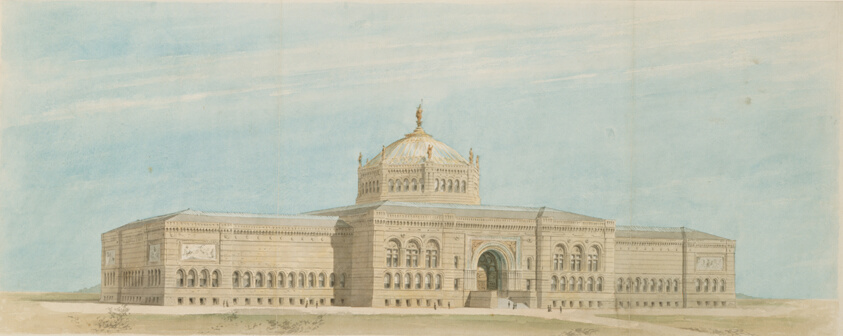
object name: Architectural Drawing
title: World's Columbian Exposition Fine Arts Museum, Chicago, Illinois, Perspective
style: 19th century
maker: John Wellborn Root; American, 1850-1891; Paul C. Lautrup, delineator; American, active 1890s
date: c. 1890–1891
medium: Watercolor over graphite on paper, mounted on linen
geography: United States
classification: presentation drawing; architectural drawing; architecture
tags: Chicago, architecture, buildings, perspective, illinois, world's fairs, architectural drawing, dome, drawing, landscape, museum, presentation drawing, sky, windows